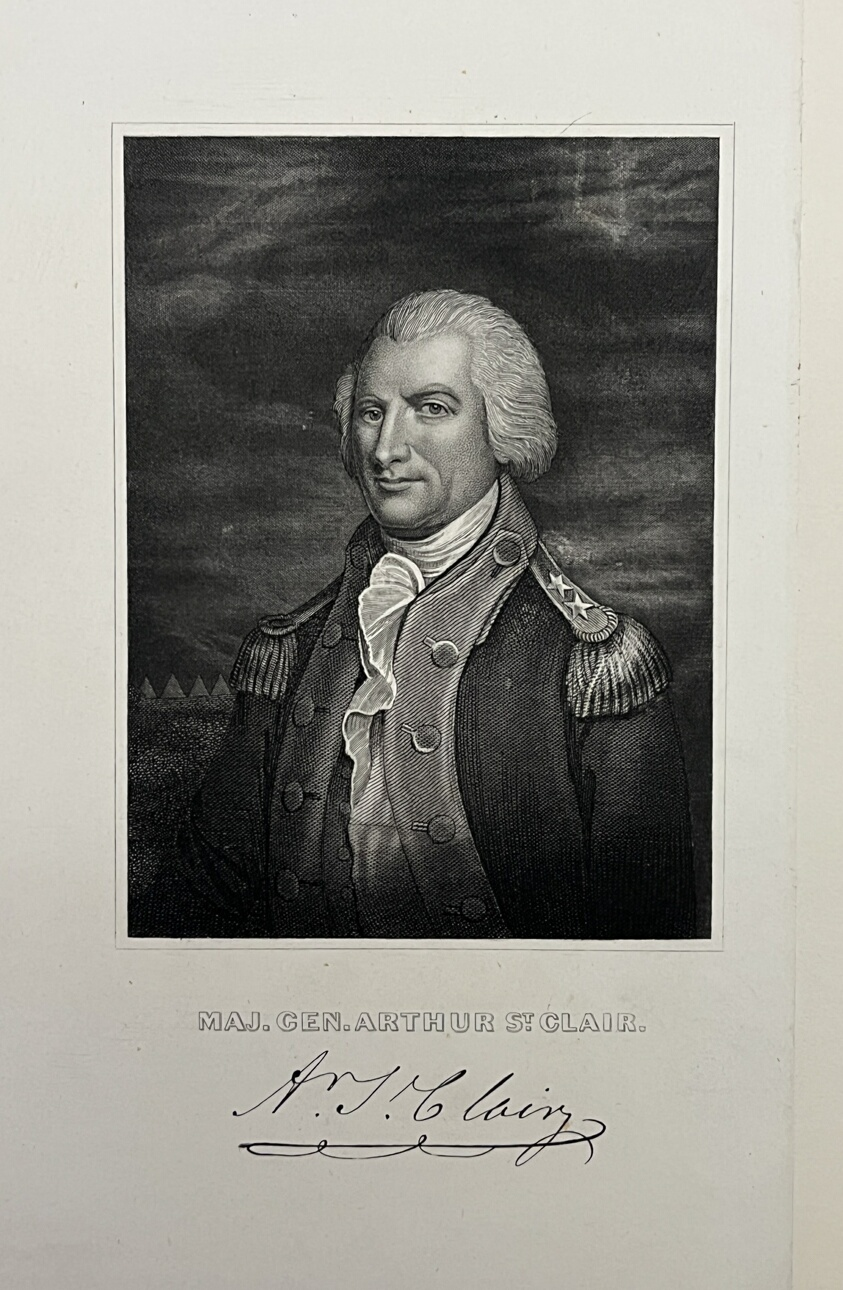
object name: Print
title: Major General Arthur St. Clair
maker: Artist Unknown (Likely American, 19th century); after Edward Wellmore (American, active mid-19th century); after James Barton Longacre (American, 1794-1869); after Charles Wilson Peale (American, 1741-1827)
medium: Etching on paper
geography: United States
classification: reproduction; print; prints and drawing